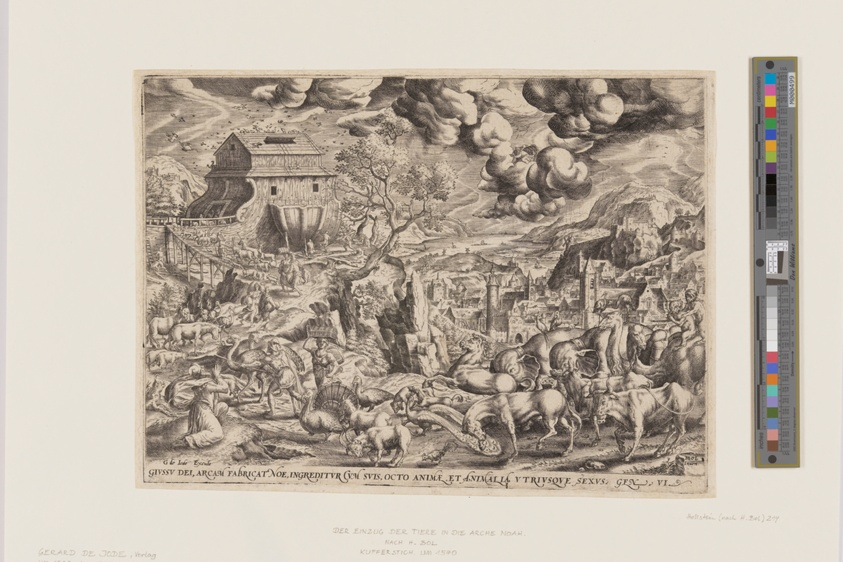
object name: Print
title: The Pairs of Animals Entering the Ark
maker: After Hans Bol; Flemish, 1534–1593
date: c. 1570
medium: Engraving on ivory laid paper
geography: Flanders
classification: engraving; paper; print; prints and drawing